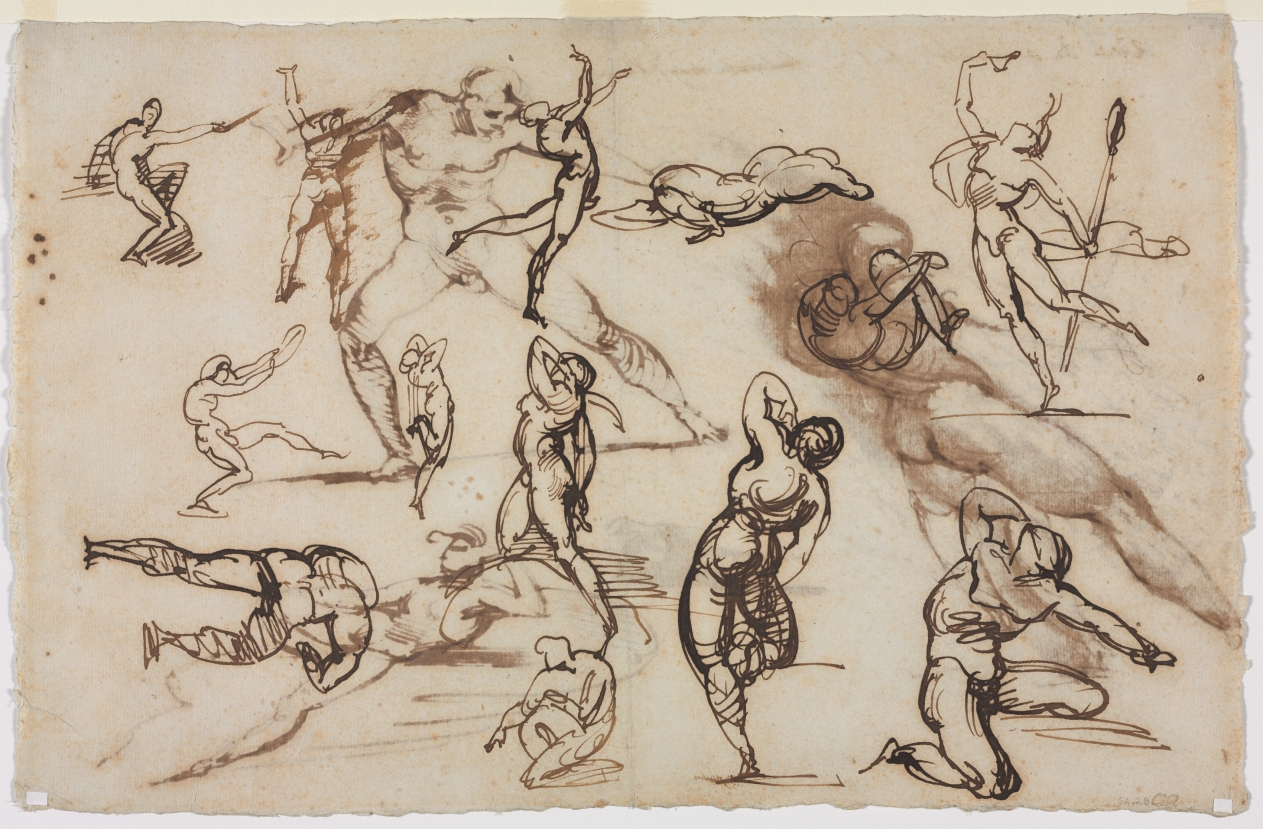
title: Sheet of Sketches (verso)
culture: France, 19th century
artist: Théodore Géricault (French, 1791–1824)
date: 1819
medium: pen and ink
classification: Drawing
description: The inscription at the upper left of the sheet states that Géricault executed these studies at the spring of the Magdelaine, near the forest of Fontainebleau, which he visited in 1819. The male figures closely resemble the earlier studies he made while in Italy of peasants during horse races at annual Roman carnivals. Here, men struggle to keep control of their unseen animals during the moments before the race. The verso female figures, visible though the paper, derive directly from Pompeiian paintings of bacchanals, or revelers participating in festivals honoring Bacchus, the god of wine.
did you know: Géricault died at a young age and had a professional career lasting only just over a decade.